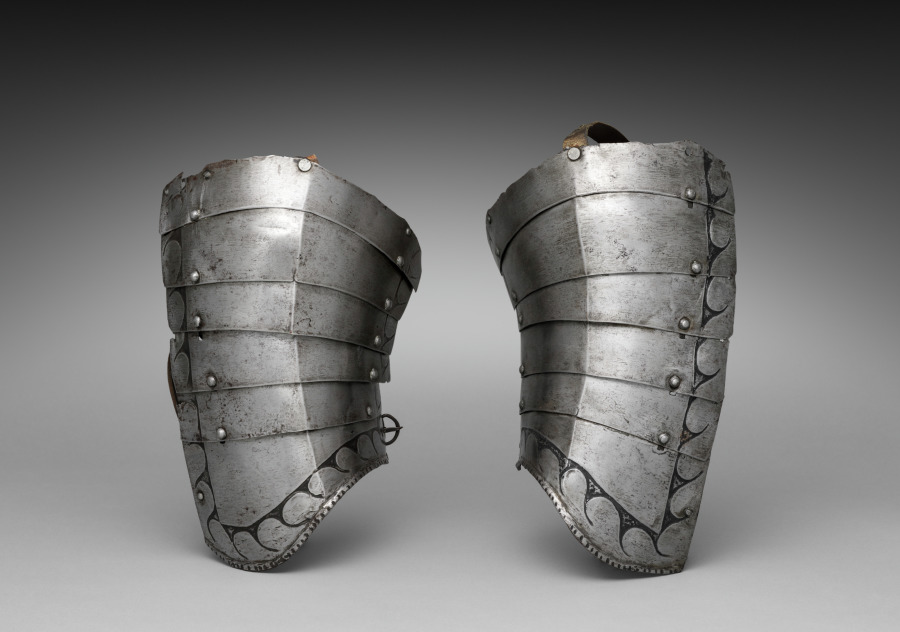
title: Pair of Espaliers (Pauldrons/upper arm canons)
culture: Germany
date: 1500s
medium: steel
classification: Arms and Armor